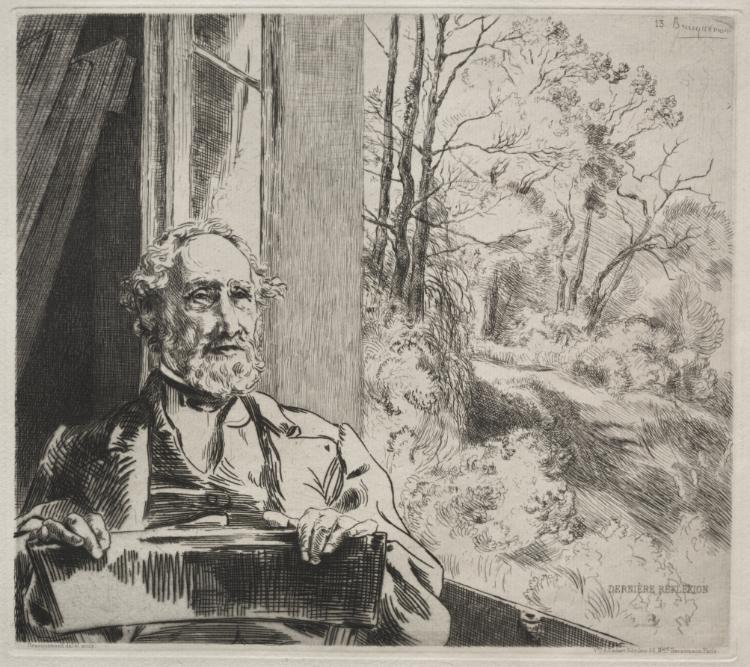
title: Meyer-Heine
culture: France, 19th century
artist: Félix Bracquemond (French, 1833–1914)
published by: Alfred Cadart (French, 1825–1875)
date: c. 1872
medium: etching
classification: Print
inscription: upper right, in plate: 13; signed, upper right, in plate: Bracquemond; printed lower margin: Bracquemond, del. et sculp.; printed lower right, in image: Dernière Reflexion; printed lower right margin: Vve A. Cadart Edit. Imp. 56, Bard Haussmann, Paris